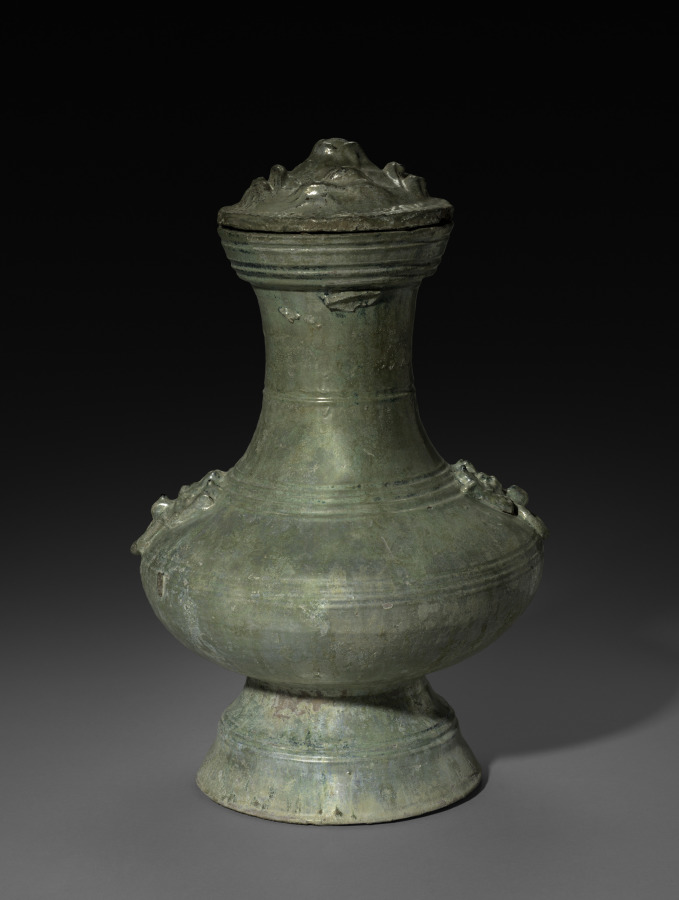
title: Covered Jar (Hu)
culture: China, Eastern Han dynasty (25–220 CE)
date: 25–220 CE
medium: earthenware with lead glaze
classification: Ceramic